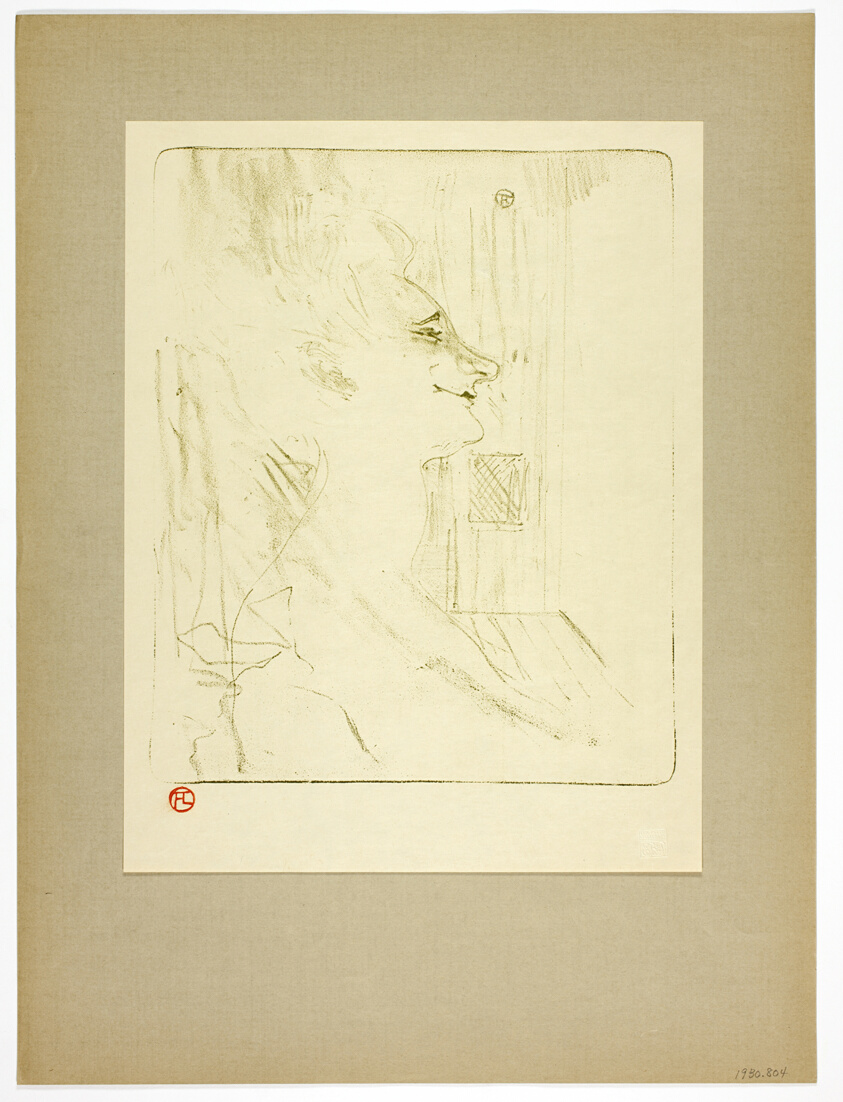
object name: Print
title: Soûlarde, plate six from Yvette Guilbert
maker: Henri de Toulouse-Lautrec (French, 1864-1901); printed by Westminster Press (English, 20th century); published by the Ernest Brown & Phillips (English, 20th century)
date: 1898, printed 1930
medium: Lithograph (crayon) in olive-green on cream wove paper hinged at top corners to gray-brown wove paper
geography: France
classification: lithograph; print; prints and drawing